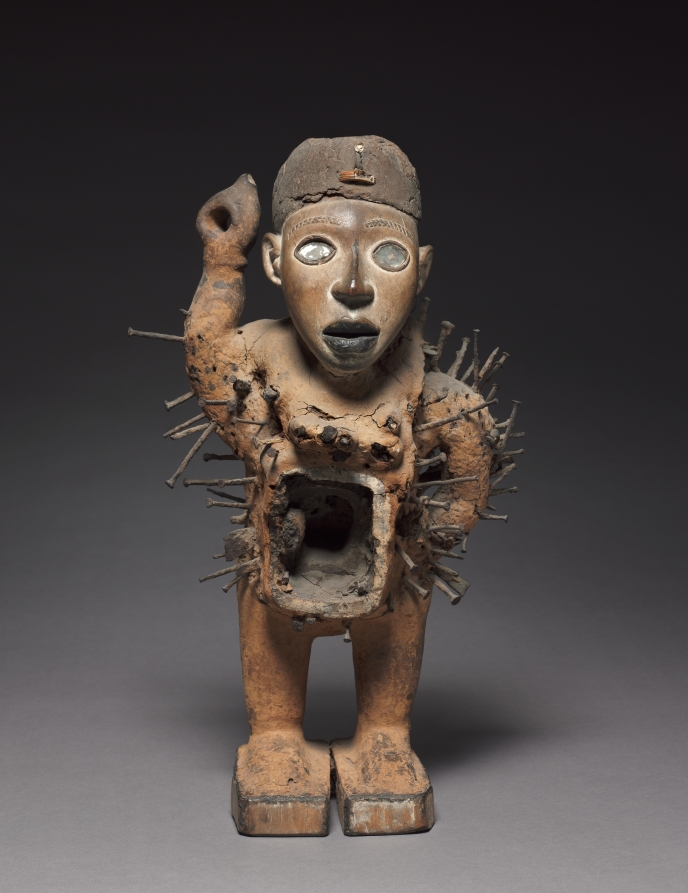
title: Male figure (nkisi nkondi)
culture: Democratic Republic of Congo or Cabinda (Angola), Kongo artist and nganga (priest)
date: late 1800s-early 1900s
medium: Wood, metalized glass, iron, organic material, ivory or plastic, and natural fiber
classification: Sculpture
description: This nkisi nkondi (power figure) lacks most of the materials that transformed it into a vessel for a spirit. Carved by sculptors, minkisi hosted spirits after banganga (priests) placed substances inside to empower them. The mirrored eyes, resin cap, and stomach chamber once contained empowering materials. After the nkisi had served its purpose the nganga removed the materials, stripping it of its spiritual power; the remaining sculpture was discarded. Sometimes, Kongo people removed materials as acts of anti-colonial resistance, disempowering minkisi before Europeans seized them. While we don’t know why it was disempowered, this sculpture is no longer spiritually active.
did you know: A mix of locally made and imported metal nails, blades, and screws cover this figure.